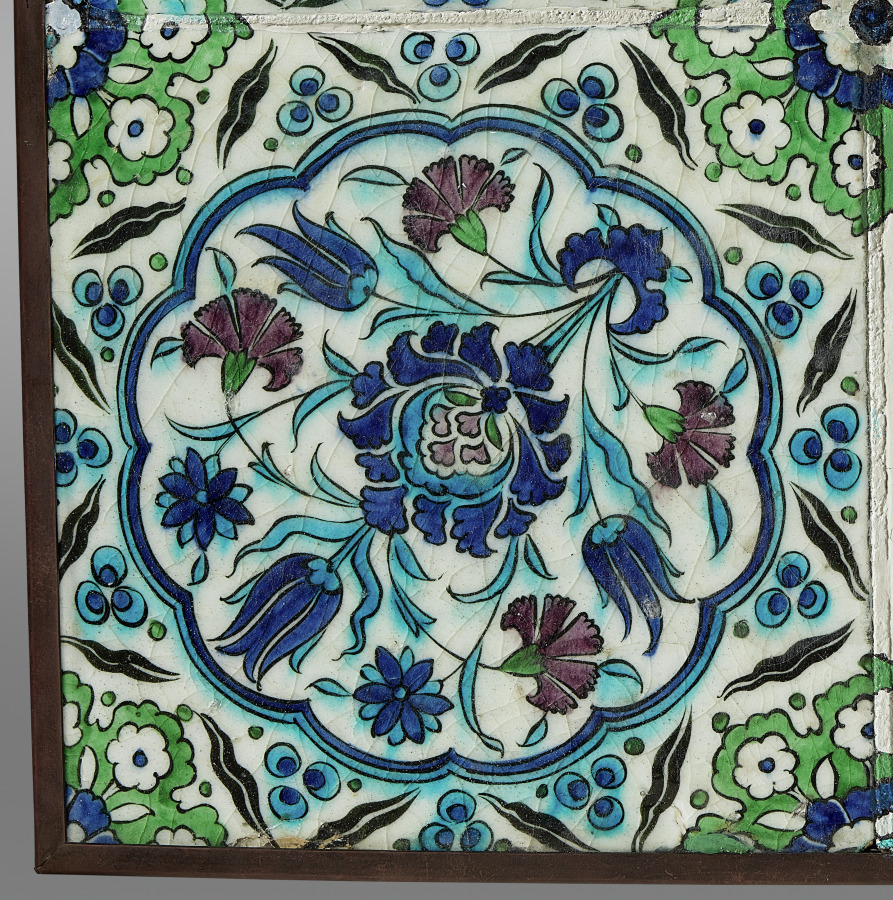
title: Wall Tile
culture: Turkey (Iznik), Ottoman Period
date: 1600s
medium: fritware with underglaze-painted design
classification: Ceramic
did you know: Ottomans used Iznik tiles to adorn public spaces and important buildings, including the court’s main residence, the Topkapi Palace.